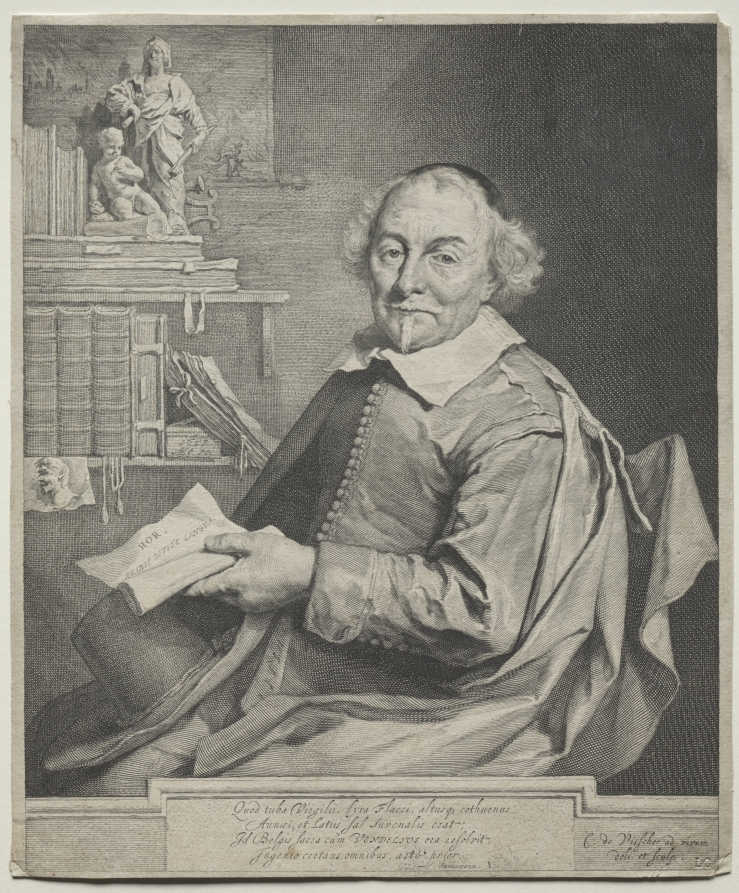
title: Vondel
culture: Netherlands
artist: Cornelis de Visscher (Dutch, 1628/29–1658)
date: 1657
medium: engraving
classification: Print